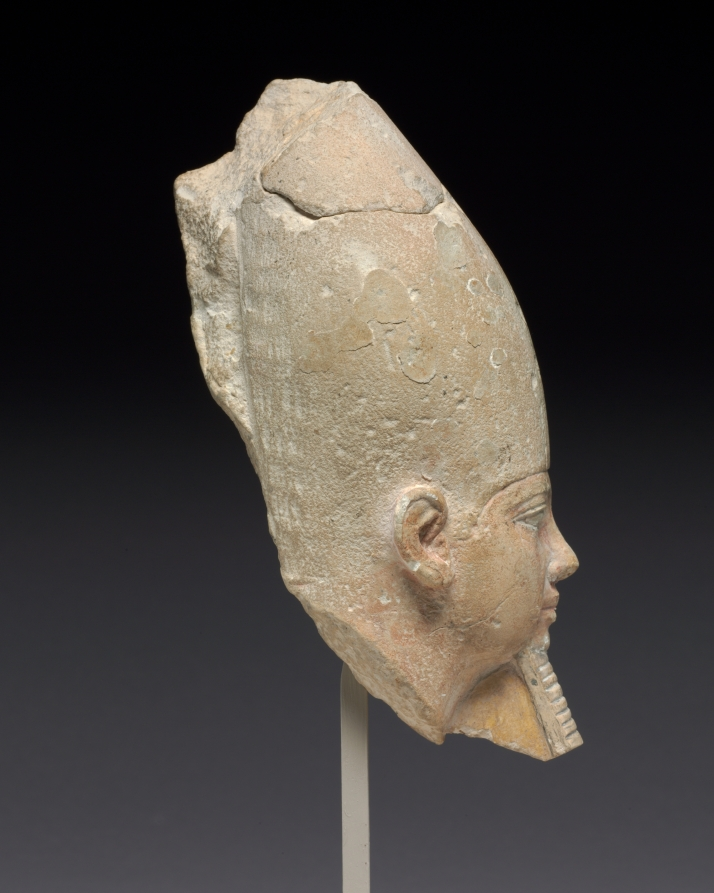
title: Head of King Userkaf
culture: Egypt, Old Kingdom (2647–2124 BCE), Dynasty 5, reign of Userkaf (2496–2491 BCE)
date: c. 2454–2447 BCE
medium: painted limestone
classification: Sculpture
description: Despite the monumental achievements of the Old Kingdom’s Pyramid Age, few images of its rulers survive. This head has been identified as King Userkaf, the first king of Dynasty 5. Userkaf built a modest pyramid at Saqqara and a temple to the sun god Ra at Abusir. According to later tradition, the first three kings of Dynasty 5 were the children of Ra himself and a mortal woman. From Userkaf’s reign on, the kings of Egypt were called "Sons of Ra." Here, Userkaf wears the two basic items of regalia that identify him as king: the tall, conical White Crown of Upper (southern) Egypt, and the royal false beard.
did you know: Visible chisel marks on the side of the crown imply that another figure once stood to the king's right; only a god or goddess could have stood in this prominent position.